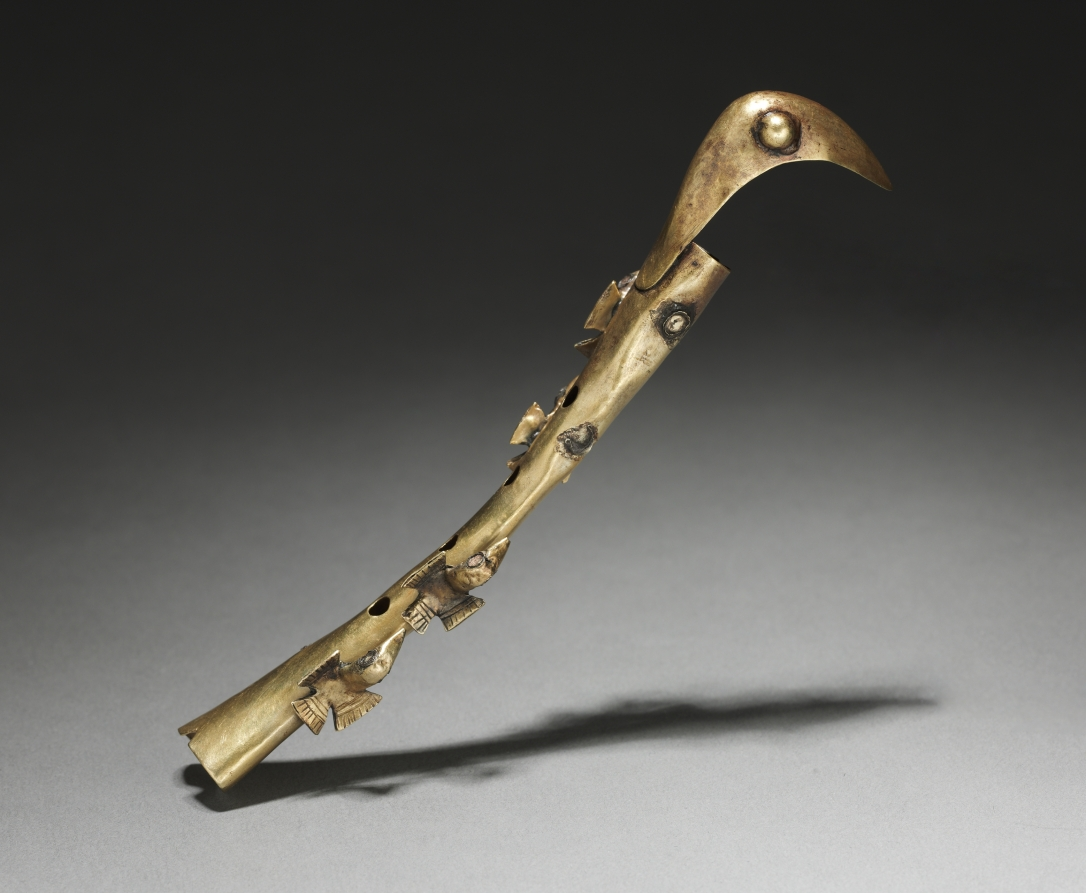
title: Flute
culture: Peru, Northern Highlands, Chavín de Huantar(?), Chavín style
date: c. 500–200 BCE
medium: hammered and cut gold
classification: Metalwork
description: There seems to be a link between Chavín religion and appearance of the Andes’ first large precious-metal objects, made using revolutionary new metallurgical processes. Chavín may have developed these technical innovations to express the inexpressible, the "wholly other" nature of its religion. In many areas, elite men and women wore the ornaments as emblems of their ties to this religion, and eventually were buried with them. These 16 objects, along with three others not in the museum’s collection, are said to have come as a group from Chavín itself.